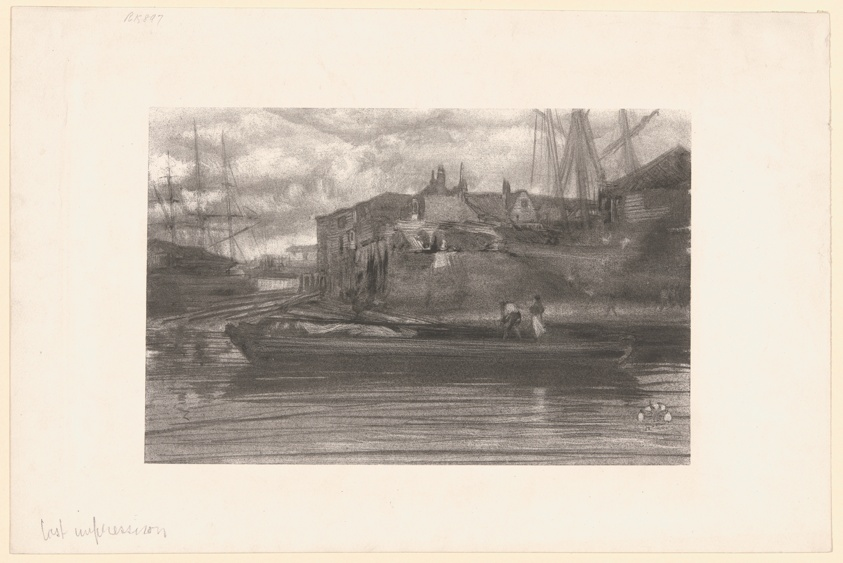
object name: Print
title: Limehouse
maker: James McNeill Whistler (American, 1834-1903)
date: 1878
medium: Lithotint in black ink with scraping and incising, on a prepared half-tint ground, on off-white plate paper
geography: United States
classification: lithotint; lithograph; print; prints and drawing; paper